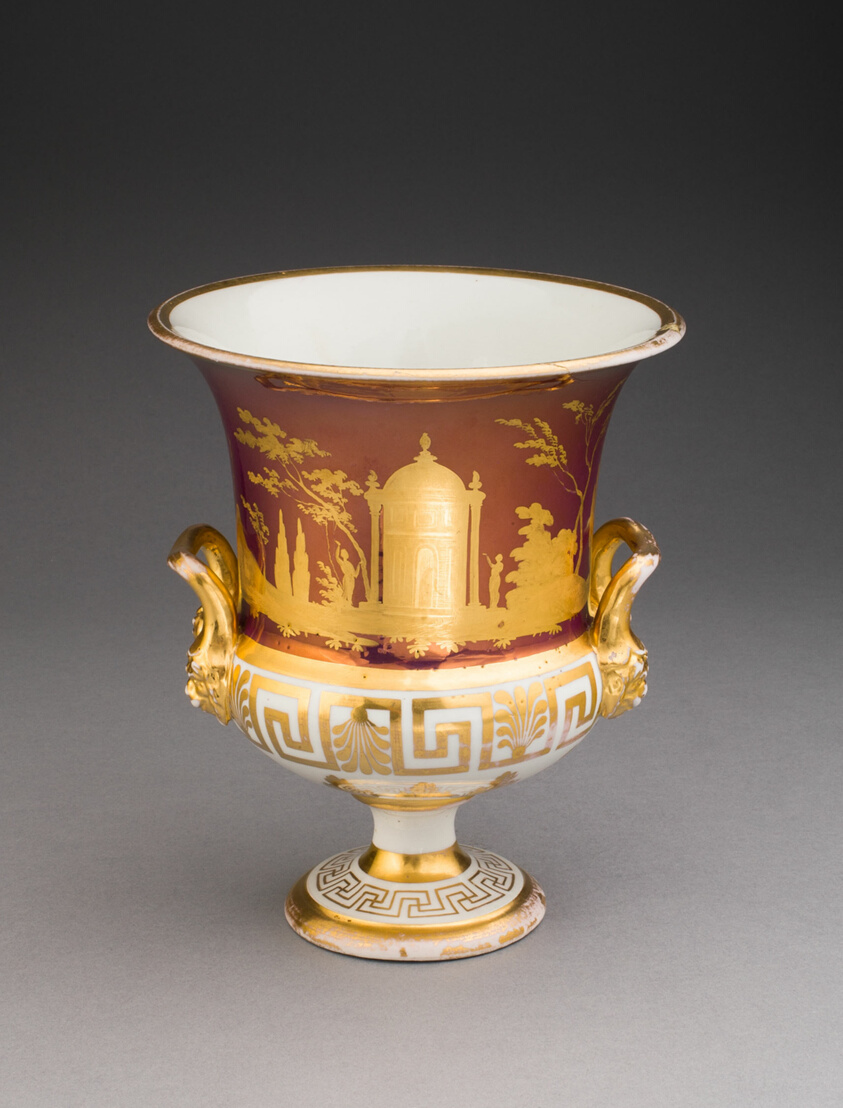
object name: Ceramics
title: Urn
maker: England, Staffordshire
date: 1805/10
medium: Lead-glazed earthenware with lustre decoration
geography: Staffordshire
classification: earthenware; european decorative arts; ceramics